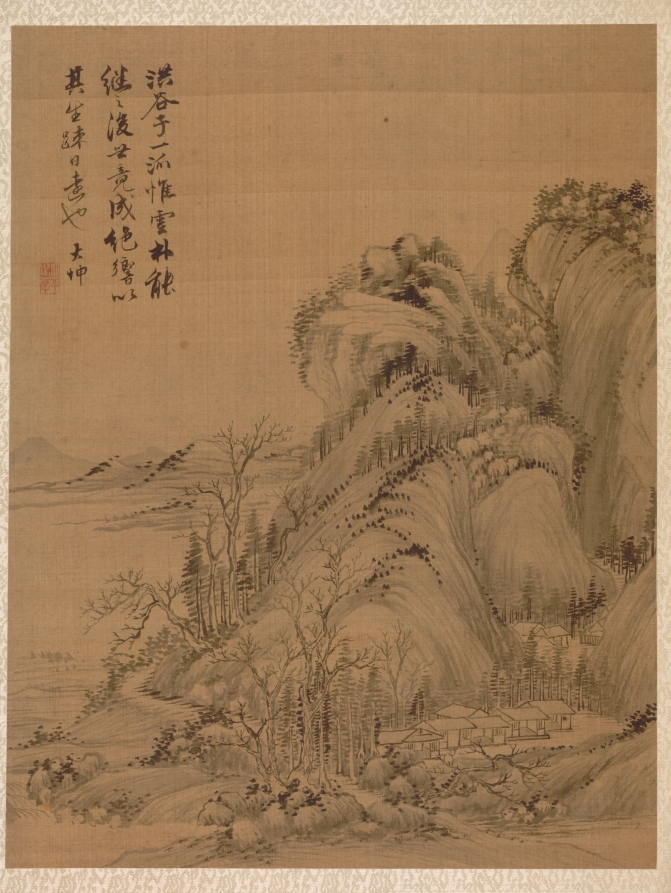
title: Landscape in the Style of Ching Hao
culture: China, Qing dynasty (1644-1911)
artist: Zhai Dakun (Chinese, d. 1804)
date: 1775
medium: album leaf; ink and color on silk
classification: Painting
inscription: Dwellings Beneath Folded Hills. Of the entire school of Hongguzi (Jing Hao; tenth century), only Yunlin (Ni Zan; 1301-1374) succeeded in continuing (his methods). Later generations endlessly achieved only echoes, and I consider that their strange (methods) daily become more distant (from their source). Dakun. Seals: 1) r/i "Dakun" 2) r/r "Zihou"